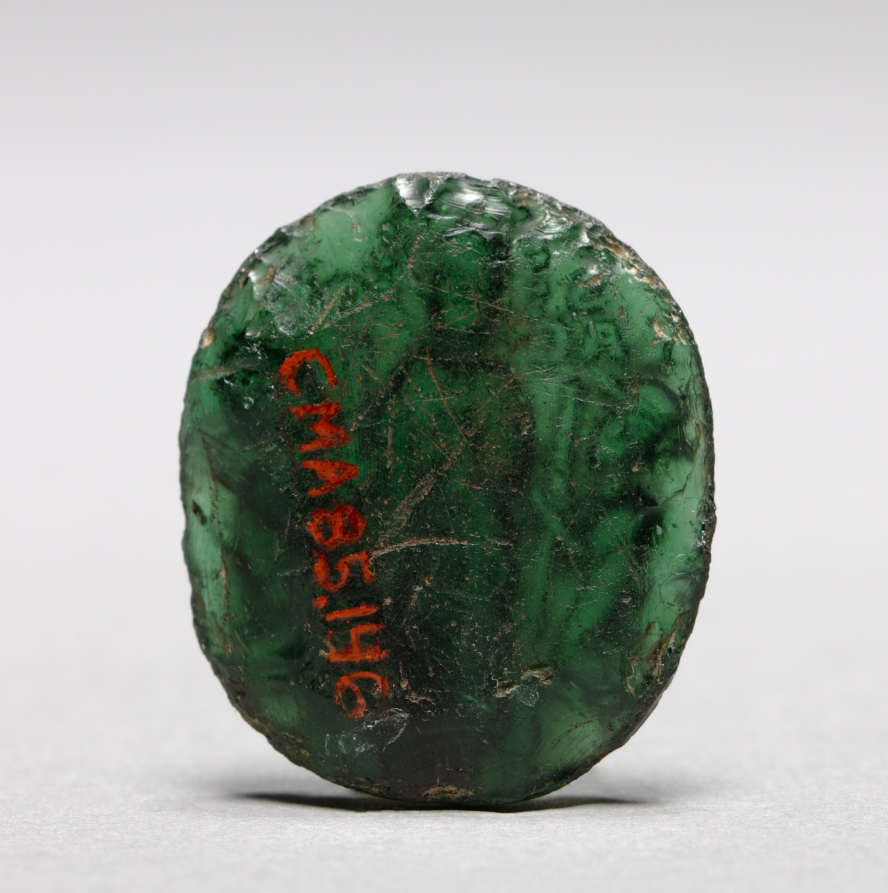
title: Devotional Badge with Saint James Flanked by Two Kneeling Pilgrims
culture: Italy, Venice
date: c. 1200–1250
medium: molded green glass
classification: Glass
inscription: inscribed: S Iacob.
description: In addition to vessels, the glass kilns of Venice produced some devotional badges such as this one. These small objects may have been collected by pilgrims as mementos. This example probably recalls a journey to Santiago da Compostella in distant Spain, one of the greatest medieval pilgrimage destinations. Thought to imitate more valuable carved gems, these glass-plate medallions were made in large quantity by pressing a mold over opaque or transparent molten glass.